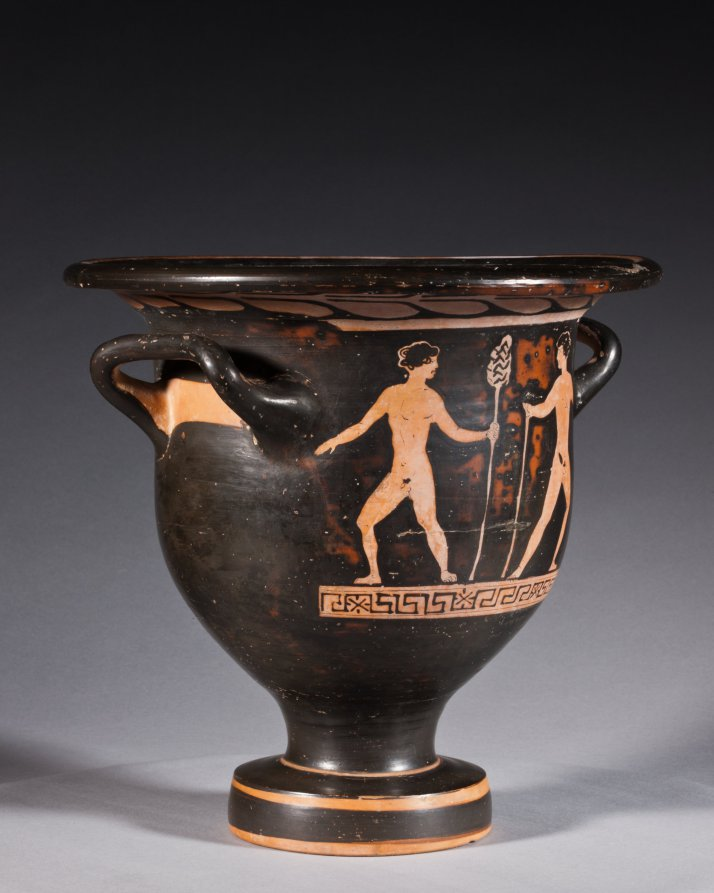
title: Red-Figure Bell Krater (Mixing Vessel): Aphrodite and Eros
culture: South Italian, Apulian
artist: attributed to Graz Painter (South Italian, Apulian, active c. 380–360 BCE)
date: c. 370–360 BCE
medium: ceramic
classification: Ceramic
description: This small mixing vessel shows a finely dressed woman seated on a chest and holding up a mirror to admire herself. Before her stands Eros, the winged god of love, holding a ribbon or sash. Behind the woman stands a pillar with the inscription ΑΦΡΟΔΙΤΗ, or APHRODITE, the goddess of love. Such labels are rare on vases, and scholars debate whether this names the woman shown as Aphrodite herself, with her son Eros, or a bride envisioning herself as Aphrodite, just before her wedding.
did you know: The dancing nude youths on the reverse are unusual; typically they would be standing and draped.